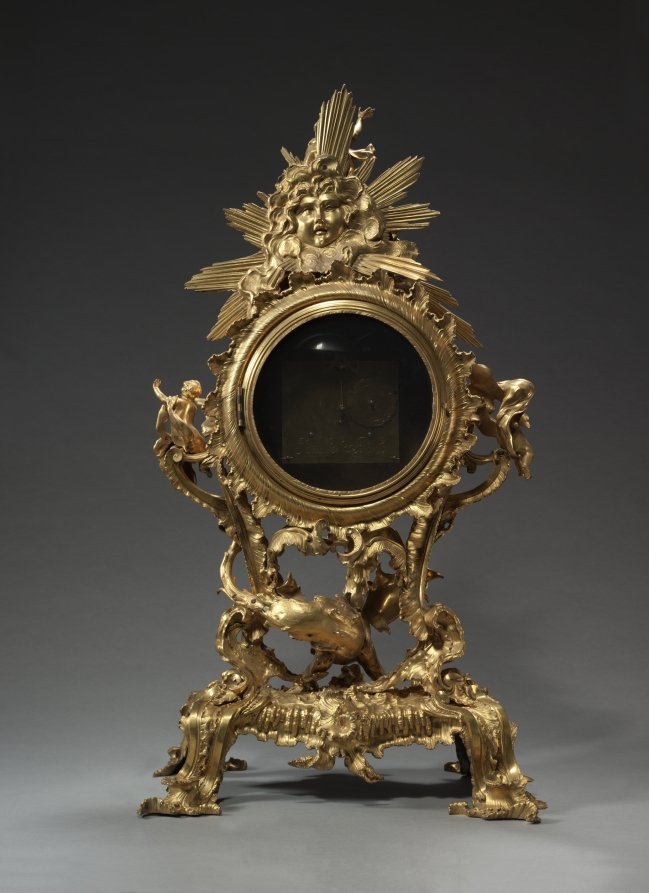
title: Clock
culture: France, 18th century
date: c. 1750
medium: gilt bronze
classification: Furniture and woodwork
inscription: on clock face: JOUARD A PARIS; engraved on plaque attached to back of clock face: Jouard Paris.